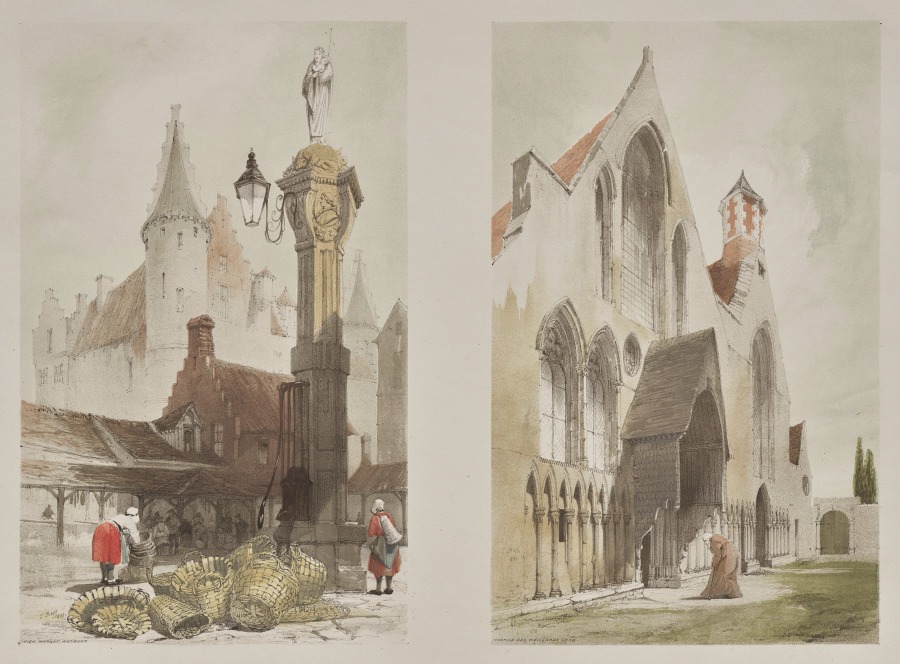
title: Picturesque Architecture in Paris, Ghent, Antwerp, Rouen: Fish Market, Antwerp, Belgium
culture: England, 19th century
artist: Thomas Shotter Boys (British, 1803–1874)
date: 1839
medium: lithograph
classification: Portfolio